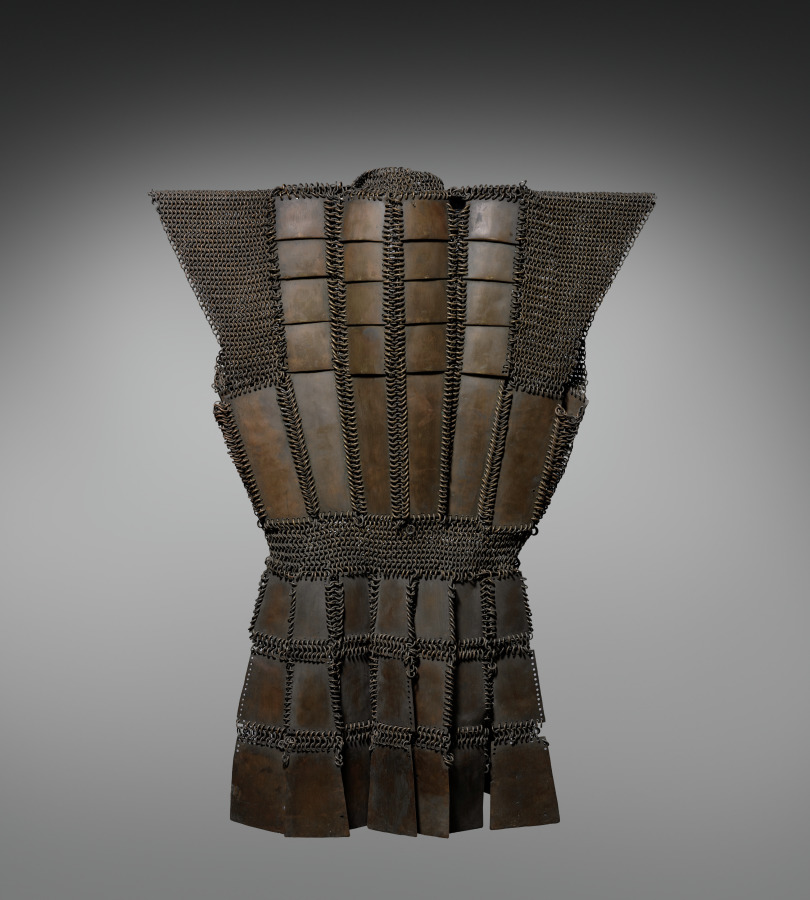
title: Maranao brass corselet (kurab-a-kulang)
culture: Philippines, Mindanao, Lake Lanao, Bacolod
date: 1800s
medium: Brass plates and chain mail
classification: Arms and Armor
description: This corselet—armor worn to protect the torso—has broad, flaring shoulders, a circular neckline, and a skirt-like extension that protected the wearer’s upper thighs. Armor of this type was worn in the Philippines following colonization by Spain. Its brass plates are connected by interlinked rings. The decorative toggles on the front take the form of stylized flowers, typical of the Maranao people native to Lake Lanao on the island of Mindanao.